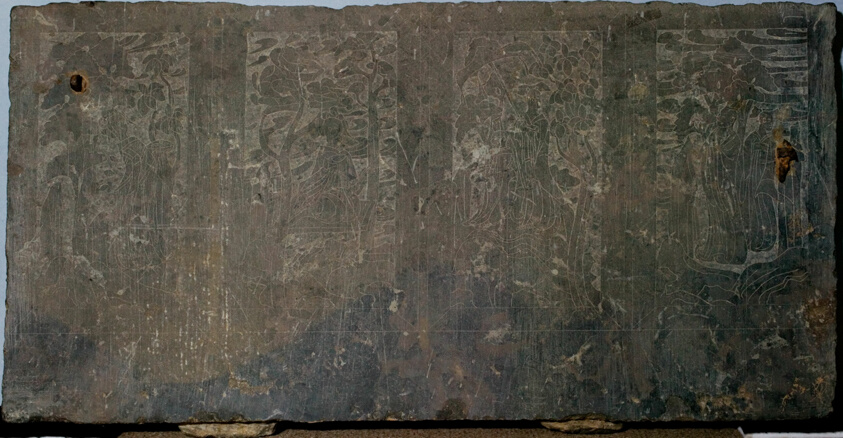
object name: Sculpture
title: Stone panel carved in low relief with narrative scenes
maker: China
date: Northern Wei dynasty (386–535), c. 525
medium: Limestone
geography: China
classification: stone; sculpture; asian art